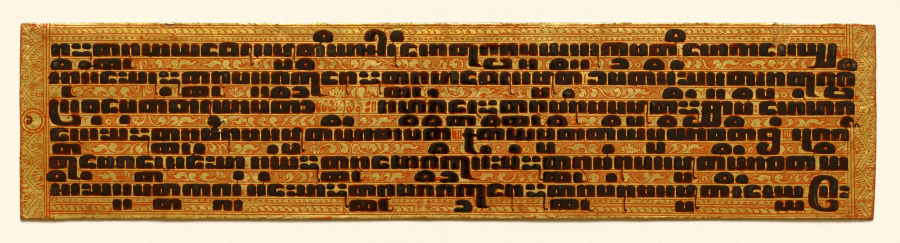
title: Text, folio 13 (verso) from a Kammavacha: Buddhist ordination text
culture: Myanmar (Burma)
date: 1800s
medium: Leaf: lacquer and gilding on cloth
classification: Manuscript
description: In premodern Burma, lay people commissioned lavishly ornamented manuscripts for ceremonial occasions, when officiants would read aloud from the text. Written in black lacquer, the text is in the language of Pali written in a Burmese script. It contains ordination rites and procedures for monastic ceremonies. The second to last page is covered with intricately drawn, winged celestial beings (nats) in gestures of praise. They fly amid intertwining vegetation—denoting bounty—that grows from serpentine forms that refer to rain clouds. Lionlike forms inhabit the space with them. The top and bottom covers are equally ornamented with jeweled floral patterning.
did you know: The Pali text of this manuscript is written in Burmese square script, which is also known as "tamarind seed script."